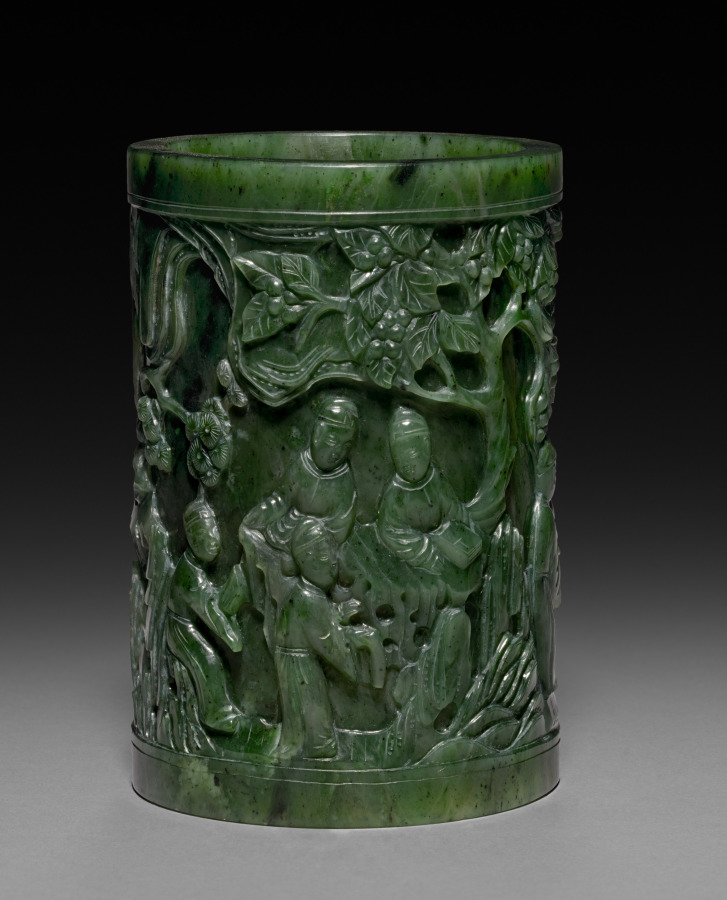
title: Brush Holder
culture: China, Qing dynasty (1644-1911)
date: 1800s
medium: spinach jade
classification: Jade